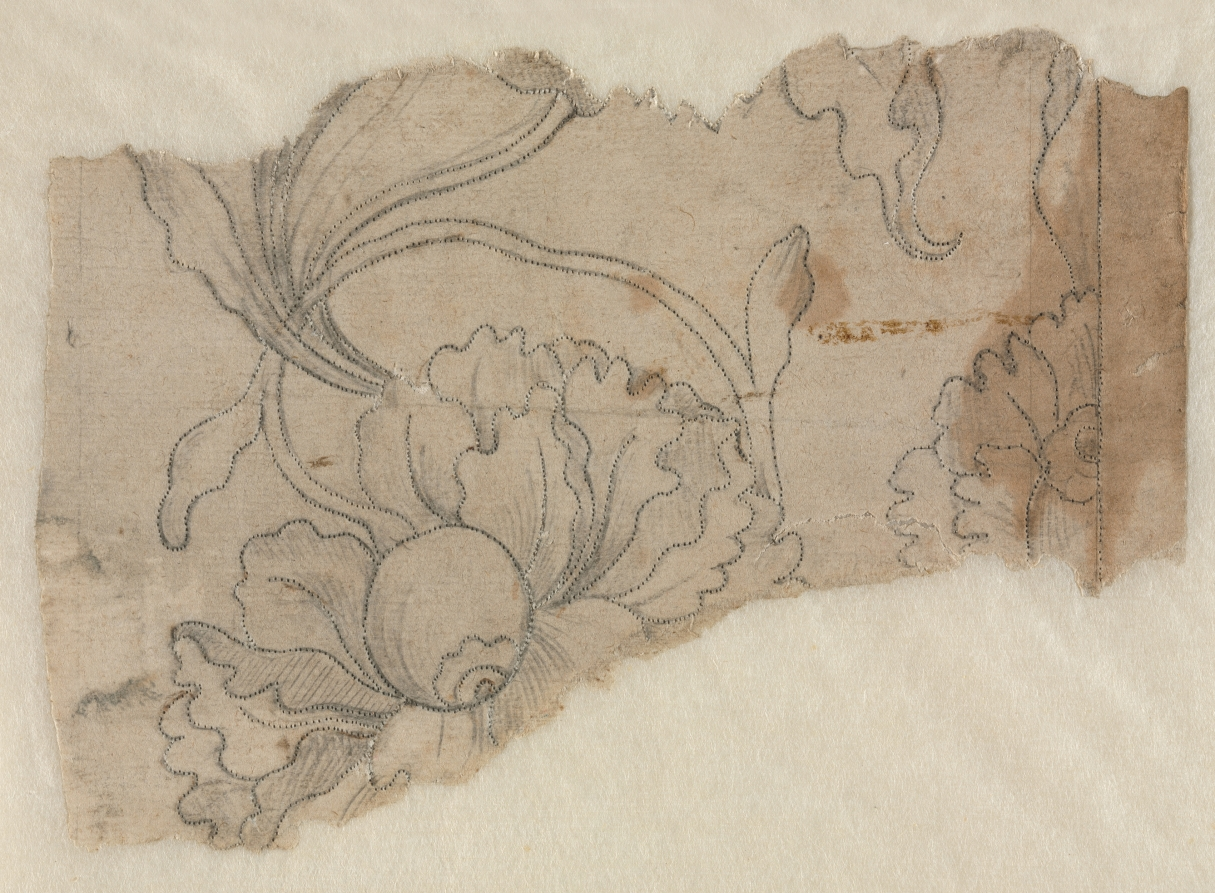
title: Marquetry Design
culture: France, 18th century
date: c. 1730/60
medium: graphite; pricked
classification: Drawing